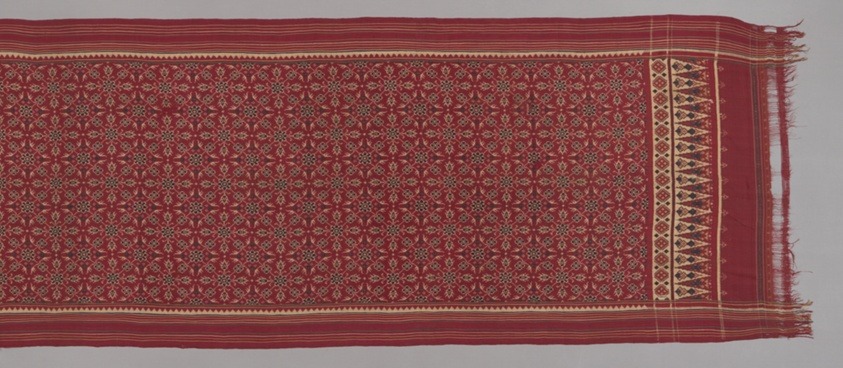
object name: Textile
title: Patolu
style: indonesian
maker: Gujarat, India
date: 18th/19th century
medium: Silk and silver-metal-strip-wrapped silk, stripes of warp and weft resist dyed (double ikat), plain weave, stripes of weft resist dyed (weft ikat), plain weave , bands of plain weave and bands of open warps; plied and knotted main warp fringe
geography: India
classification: textile; weaving - printed